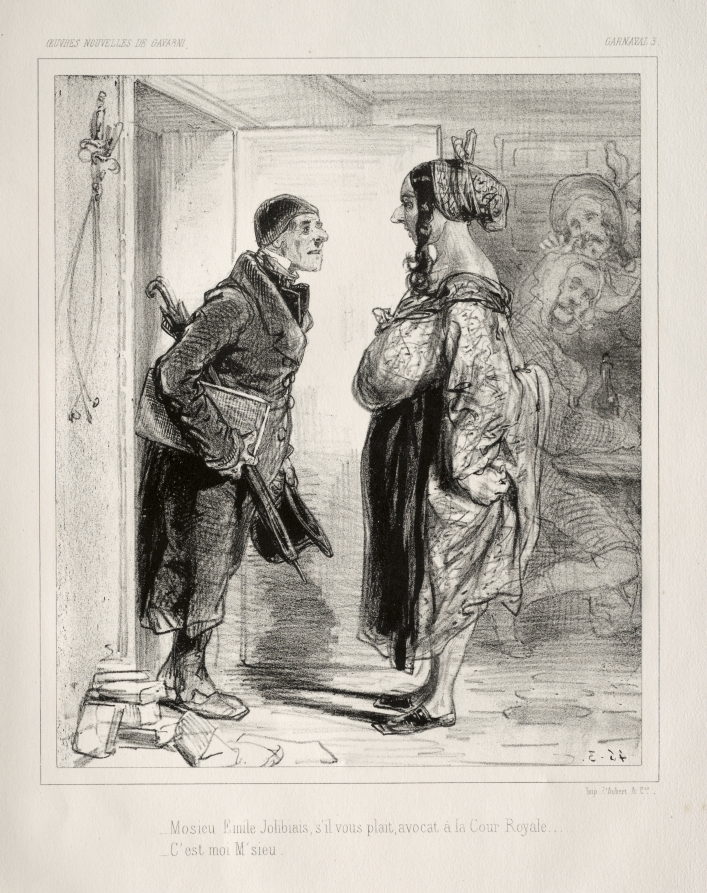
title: Carnaval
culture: France, 19th century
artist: Paul Gavarni (French, 1804–1866)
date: c. 1841–47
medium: lithograph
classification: Print